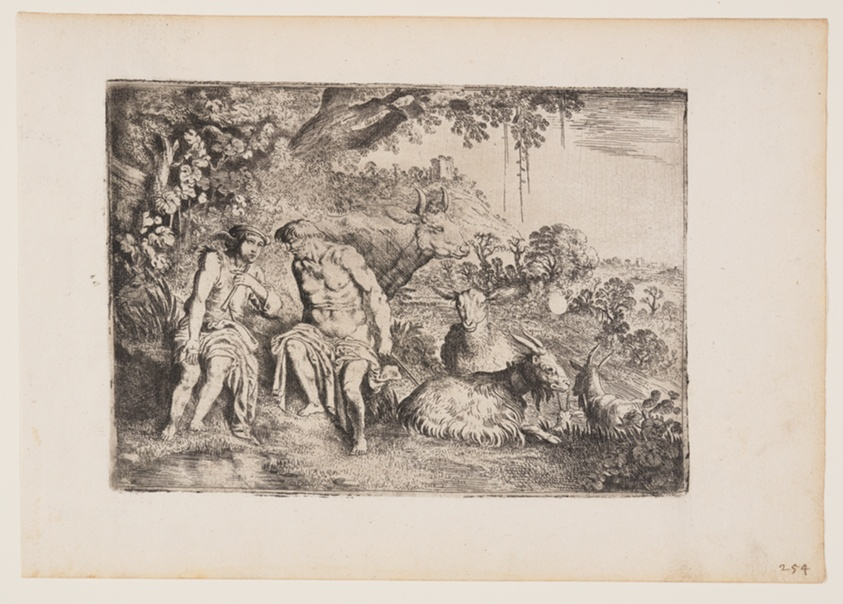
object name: Print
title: Mercury Lulling Argus to Sleep, plate 4 from The Story of Mercury and Argus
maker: Moses van Uyttenbroeck (Dutch, c. 1595–before 1647)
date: c. 1620-26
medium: Etching and platetone on ivory laid paper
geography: Netherlands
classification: etching; paper; print; prints and drawing